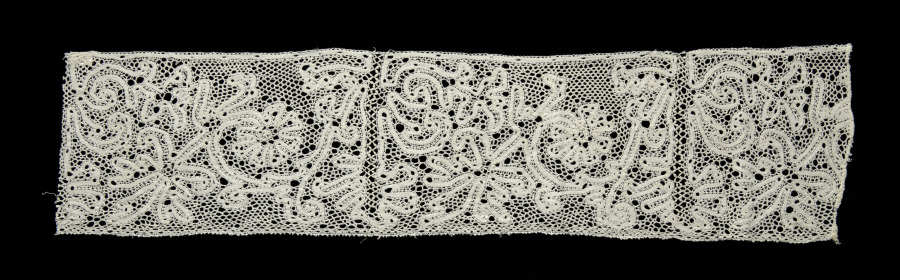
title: Lace Edging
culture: Italy, Abruzzi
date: 1700s–1800s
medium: Bobbin lace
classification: Lace